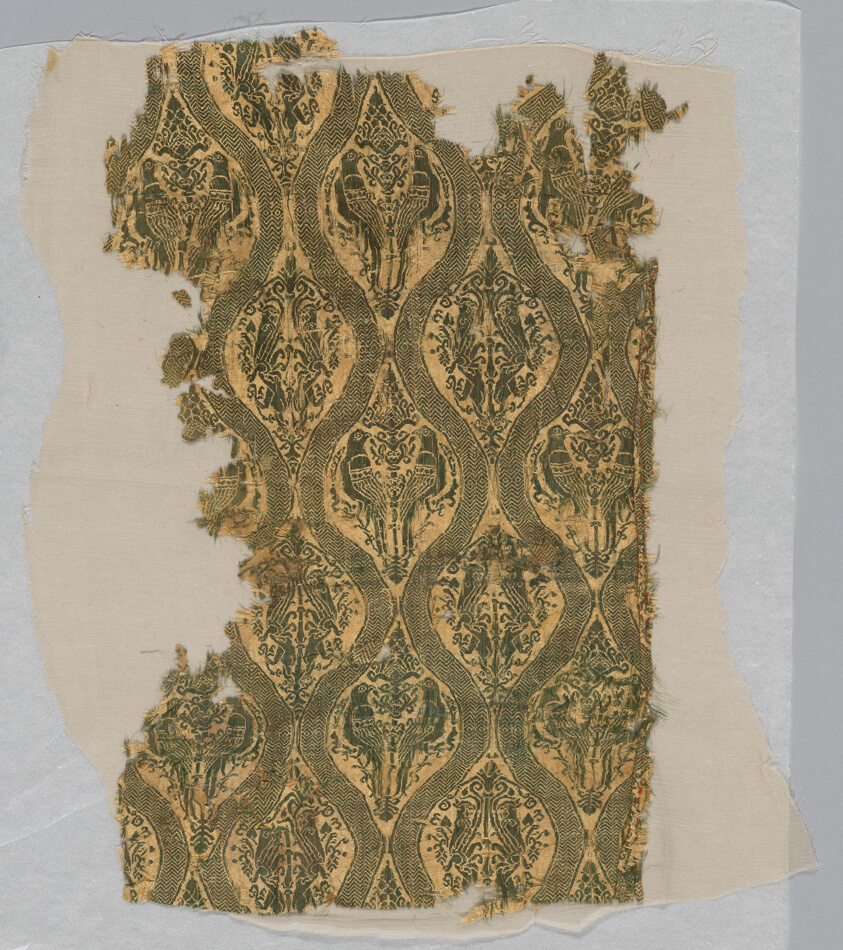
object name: Textile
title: Fragment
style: ayyubid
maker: Egypt or Syria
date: Ayyubid Dynasty (1171–1250), 1200/50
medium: Silk; lampas technique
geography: Egypt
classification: textile; weaving